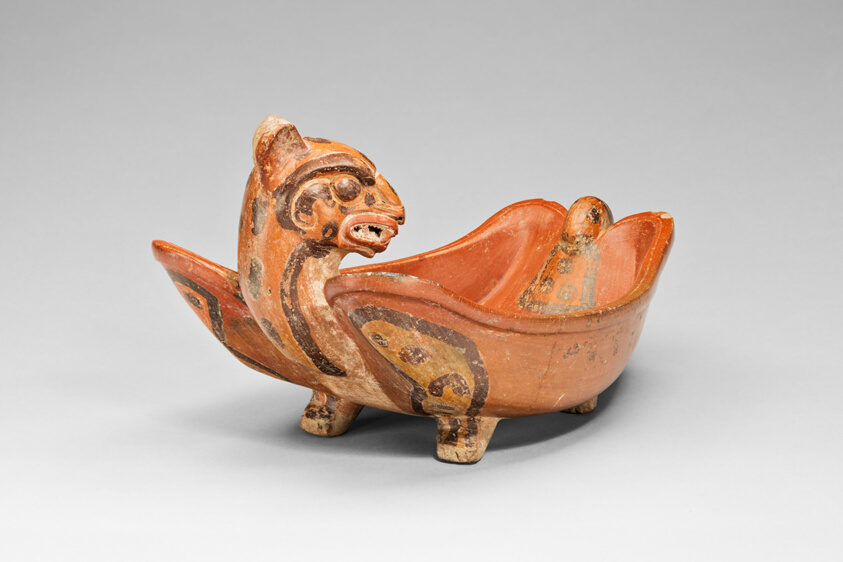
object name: Vessel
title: Open Bowl in the Form of a Jaguar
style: lower central america, Arts of the Americas, nicaragua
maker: Ometepe Island, Lake Nicaragua (Cocibolca), Nicaragua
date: 600–900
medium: Ceramic and pigment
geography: Isla de Ometepe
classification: bowl; art of the americas; ceramics; vessel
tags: animals